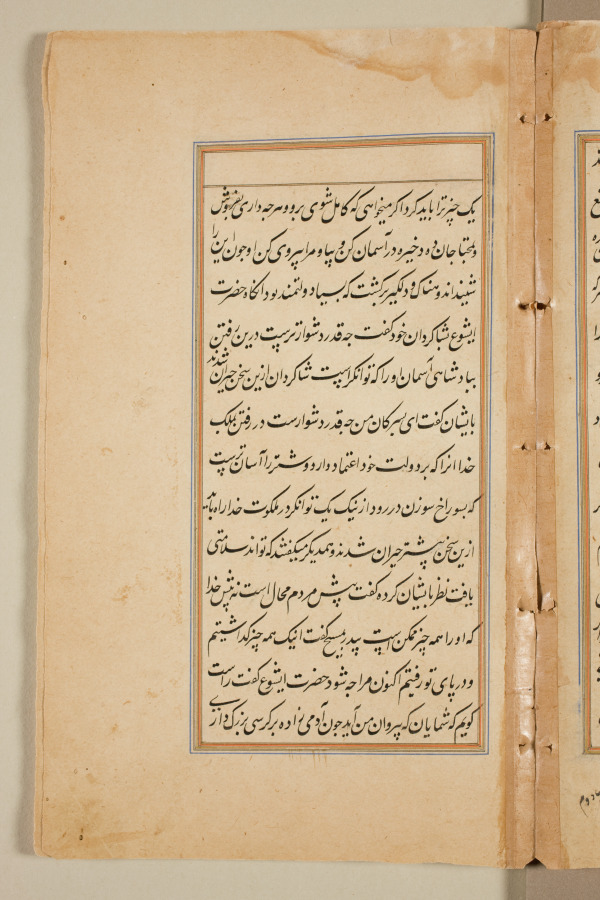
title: Text page from a Mirror of Holiness (Mir’at al-quds) of Father Jerome Xavier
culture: Mughal India, Allahabad, made for Prince Salim (1569–1627)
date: 1602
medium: Ink and gold on paper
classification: Manuscript